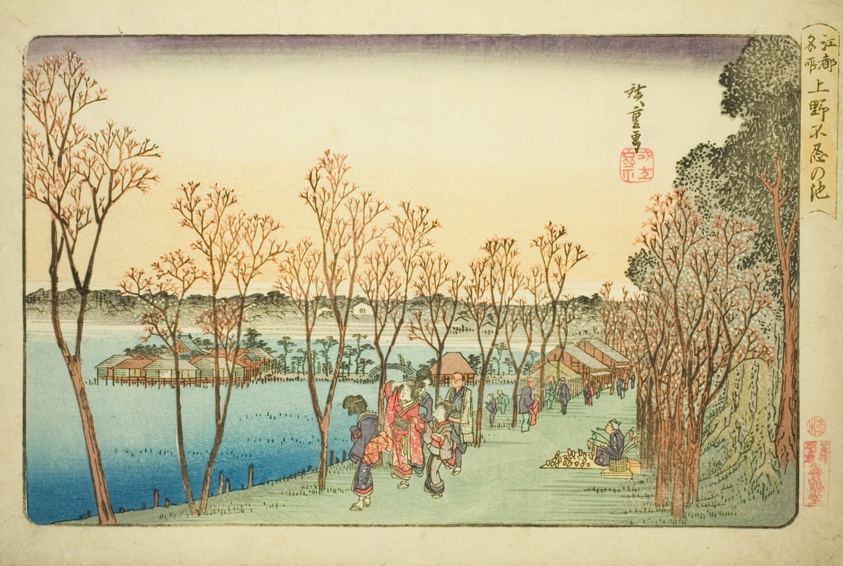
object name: Print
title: Shinobazu Pond at Ueno (Ueno Shinobazu no ike), from the series "Famous Places in Edo (Koto meisho)"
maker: Utagawa Hiroshige 歌川 広重; Japanese, 1797-1858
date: c. 1832/34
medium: Color woodblock print; oban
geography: Japan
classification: woodblock print; print; asian art